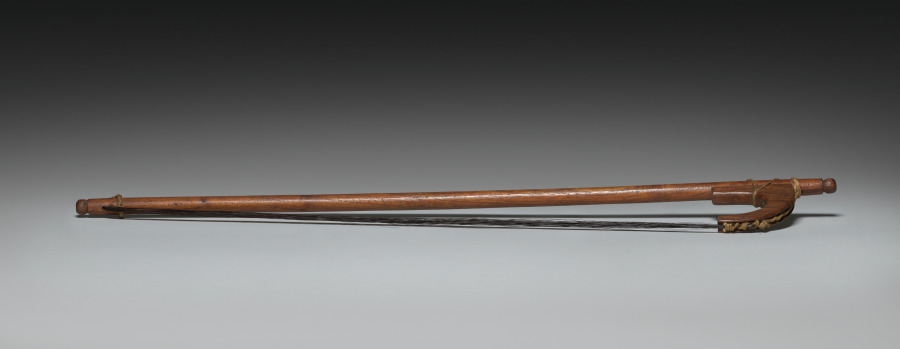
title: Bow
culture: India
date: 1800s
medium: Wood, horsehair, and jute fiber cord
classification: Musical Instrument